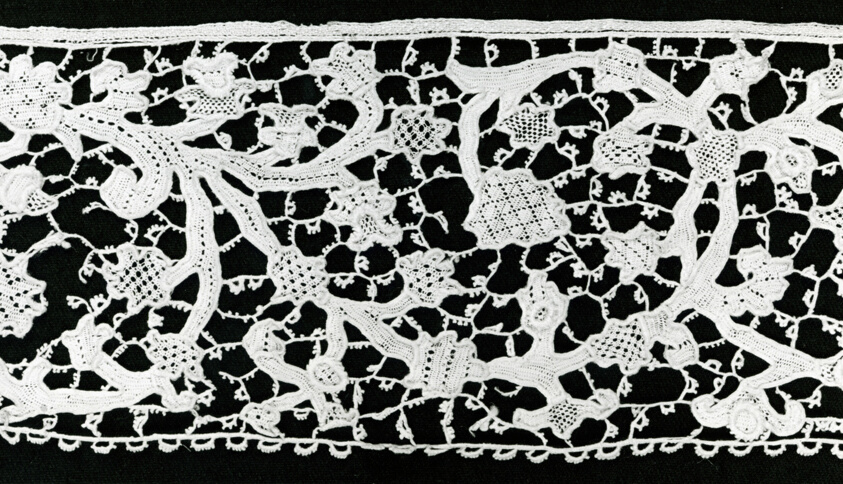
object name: Textile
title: Border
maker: Italy, possibly Venice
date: 1675/1700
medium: Linen, needle lace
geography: Italy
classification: textile; lace - needle